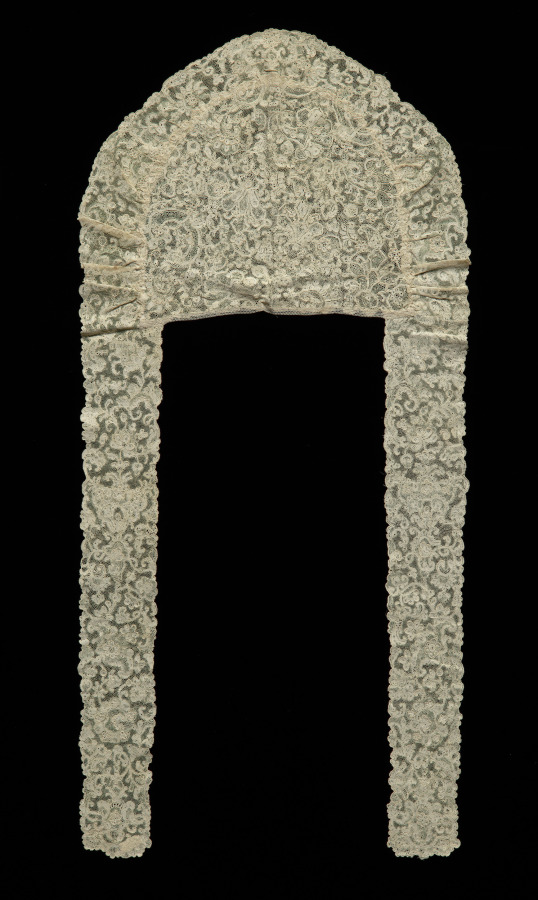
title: Lace Cap with Lappets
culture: France, Sedan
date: 1700s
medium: Needle lace (Point de Sedan)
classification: Lace